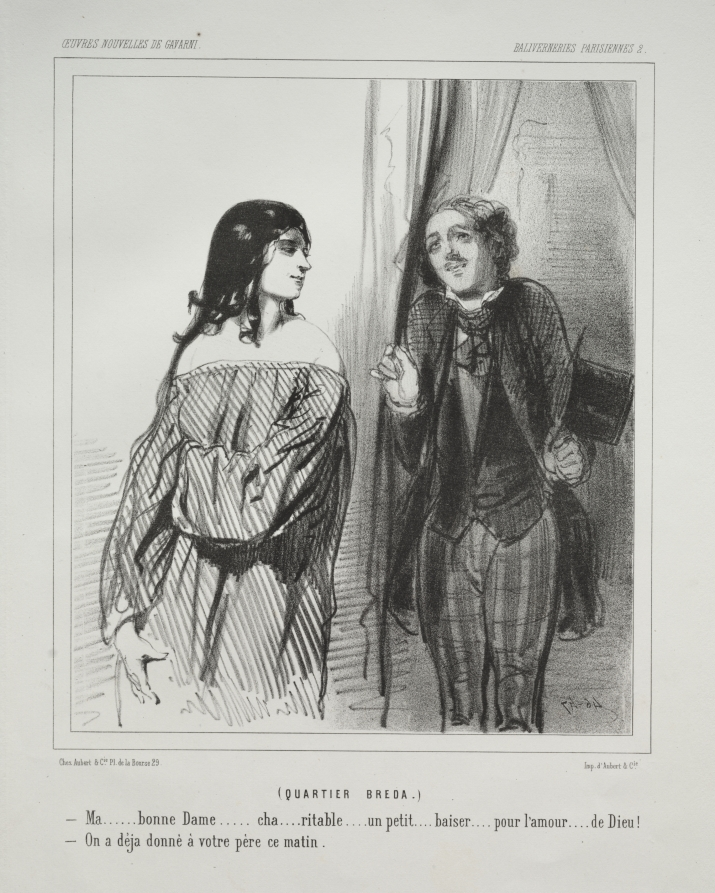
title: Baliverneries Parisiennes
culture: France, 19th century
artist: Paul Gavarni (French, 1804–1866)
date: c. 1847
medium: lithograph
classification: Print